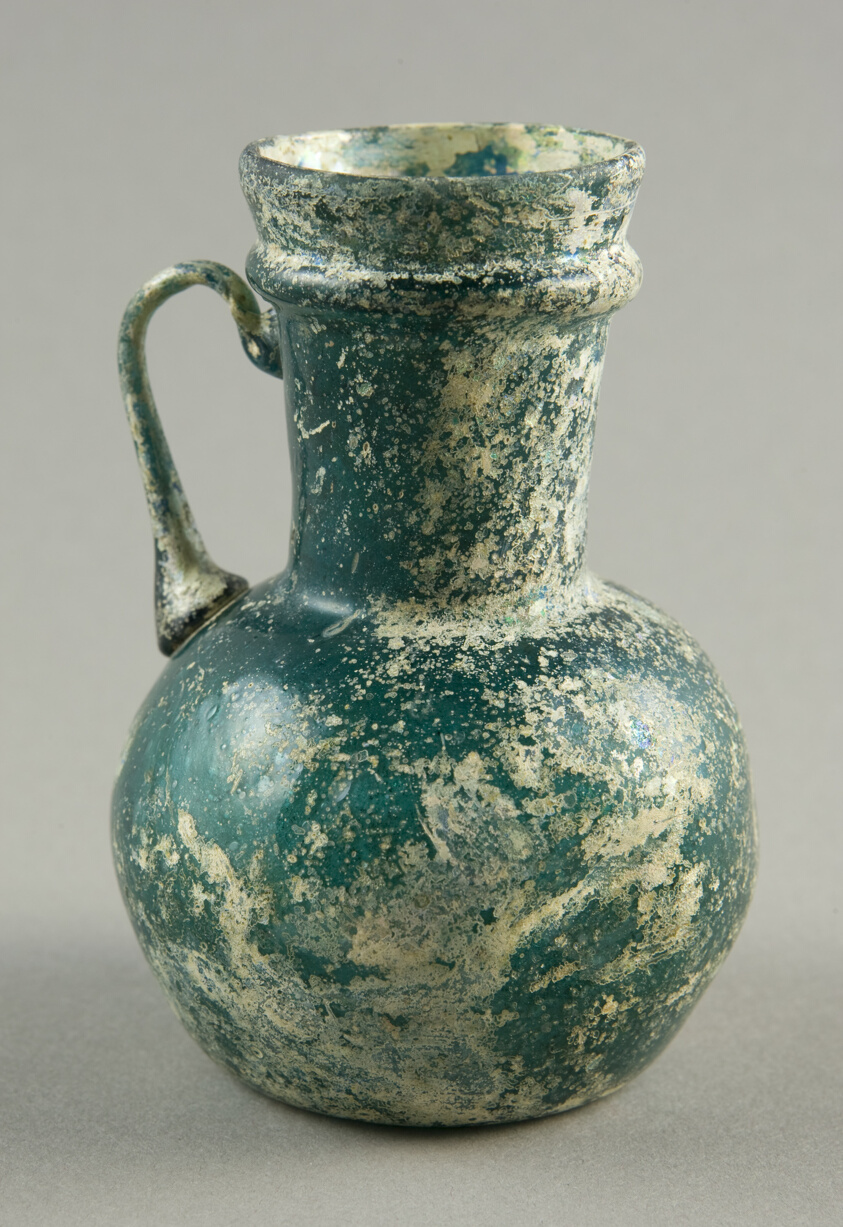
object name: Vessel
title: Flask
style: Islamic (culture or style)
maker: Islamic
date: 7th-13th century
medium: Glass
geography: Mediterranean Region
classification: glass; vessel; ancient art